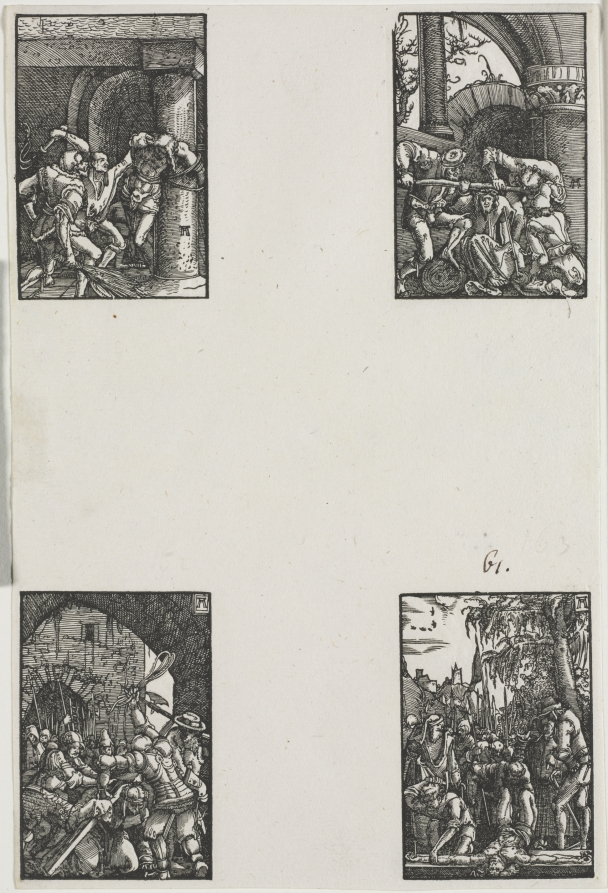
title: The Fall and Redemption of Man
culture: Germany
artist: Albrecht Altdorfer (German, c. 1480–1538)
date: c. 1515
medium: woodcut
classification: Print